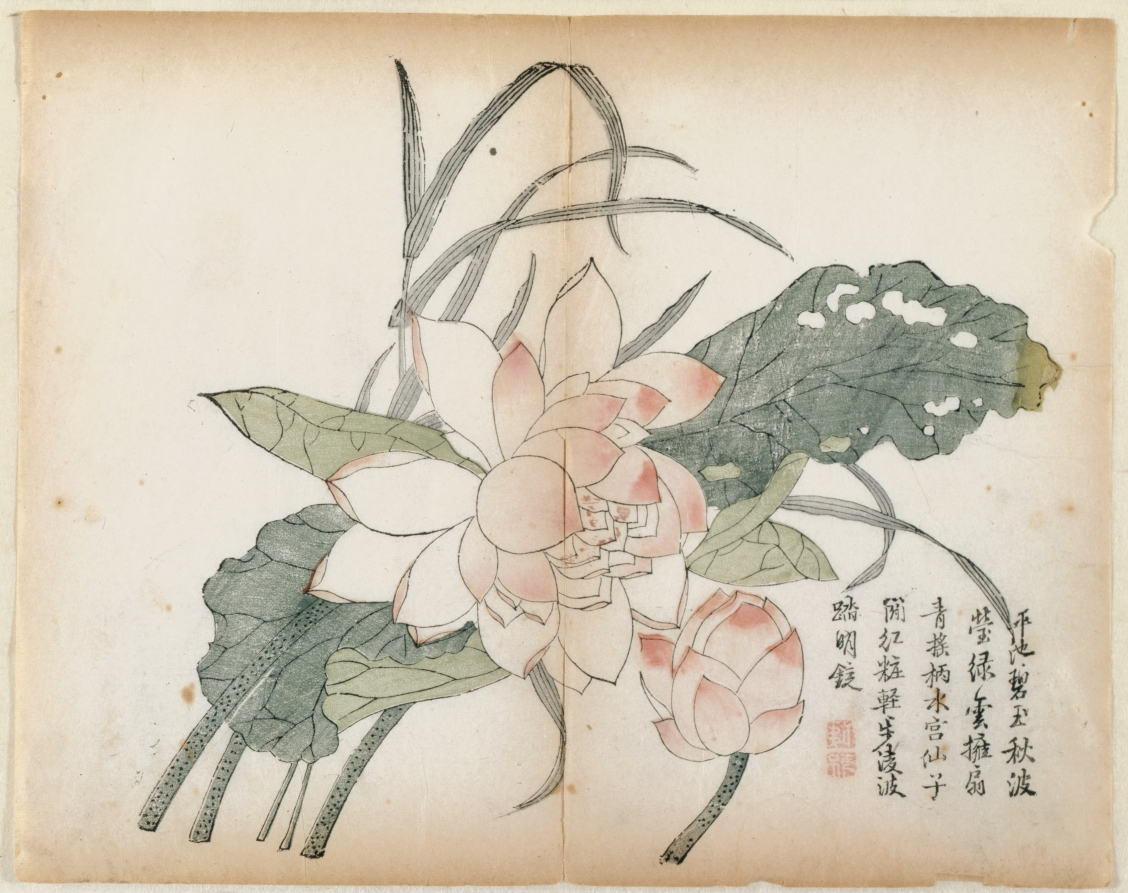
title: Flowering Lotus and Bud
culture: China, Qing dynasty (1644-1911)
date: 18th Century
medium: color woodblock print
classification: Print